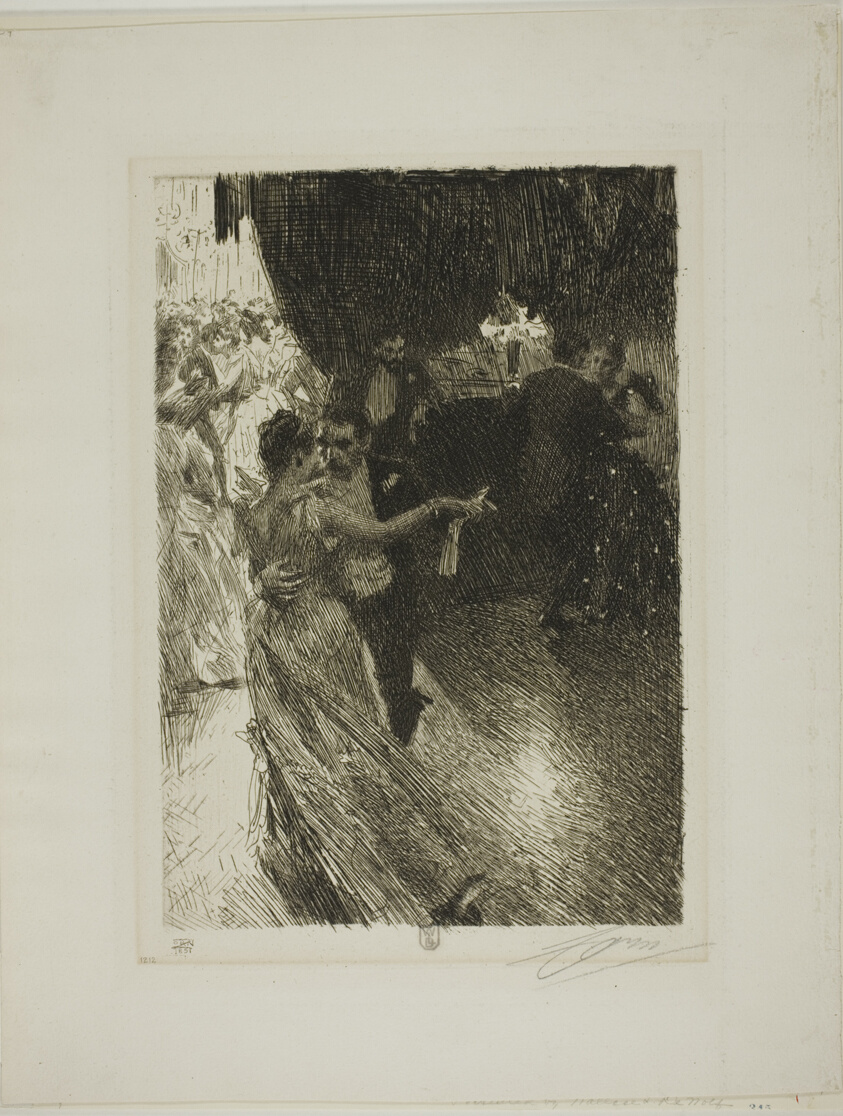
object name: Print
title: The Waltz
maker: Anders Zorn (Swedish, 1860-1920)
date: 1891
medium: Etching on ivory laid paper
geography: Sweden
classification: etching; print; prints and drawing